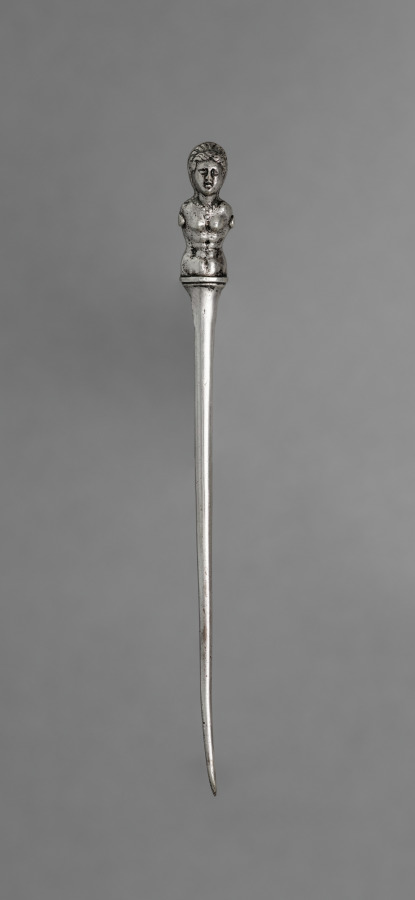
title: Pick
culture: Germany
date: 1500s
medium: silver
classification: Silver